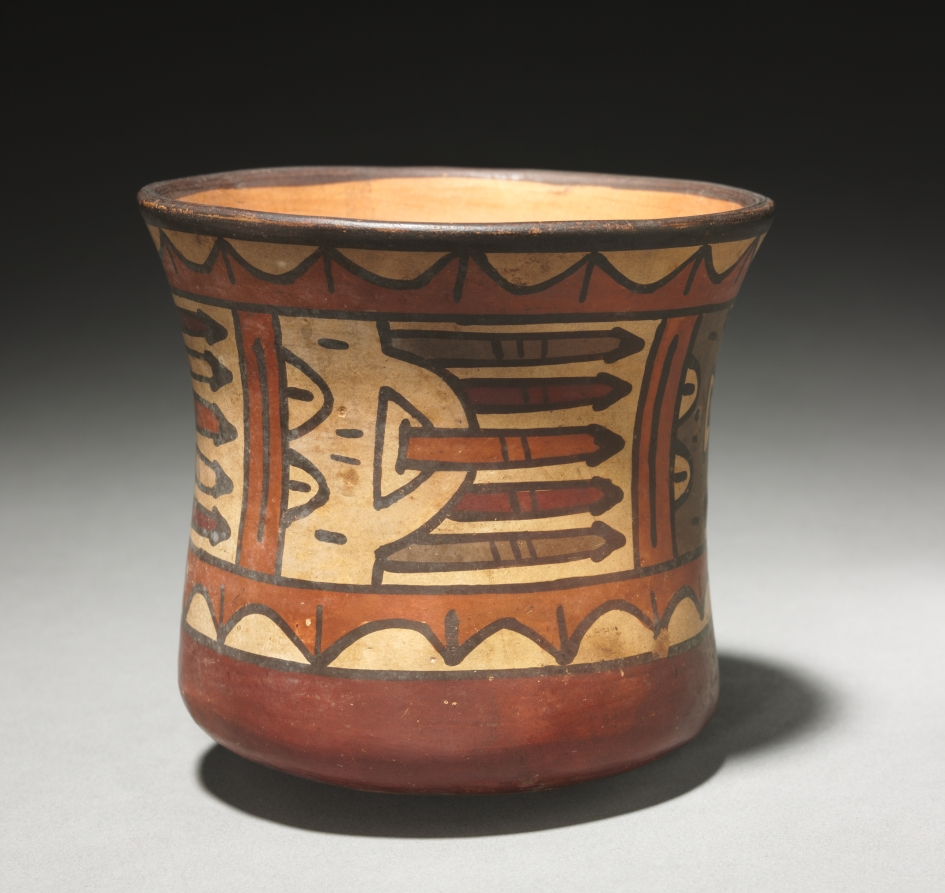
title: Bowl with Trophy Heads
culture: Peru, Nasca, Early Intermediate Period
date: c. 100–650 CE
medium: ceramic, slip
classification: Ceramic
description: Nasca is one of the two major cultures and ceramic styles of its periods, and one of the finest ceramic styles ever produced in the South American Andes. Vessel walls are thin, firing temperatures higher than in earlier times, and a variety of warm, earthen-toned slips come into use. This small bowl features repetitions of human trophy heads—a major Nasca motif that refers both to war and fertility.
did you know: Two important themes in Nasca art are war and fertility.